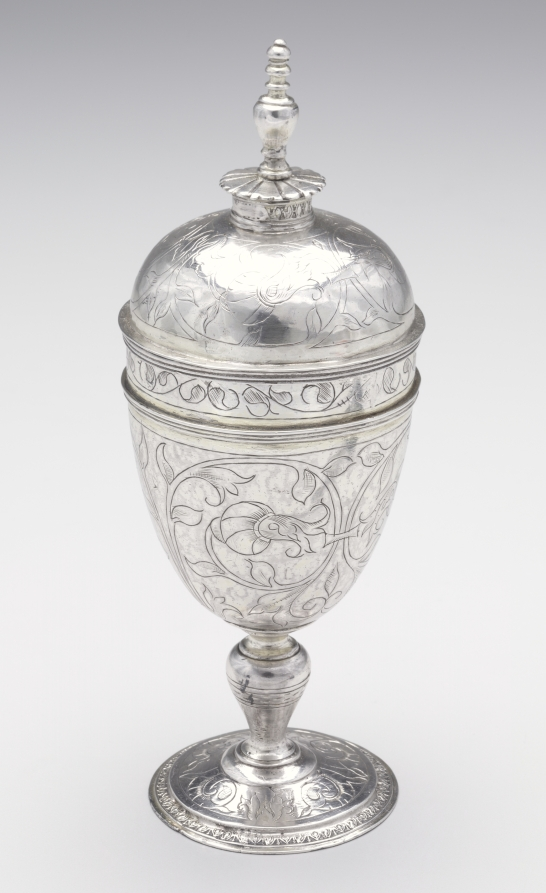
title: Standing Cup and Cover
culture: London, England, late 16th century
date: 1593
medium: silver, partially gilt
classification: Silver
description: Produced during the last years of the Tudor dynasty (1485–1603), this vessel exemplifies the symmetrical patterns, horizontal designs, and clear division of space typical of English silverwork at the time. The functional shape and ornamental designs characteristic of standing cups made them ideal for ceremonial occasions.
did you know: Often made for members of guilds and trade associations in London, standing cups were frequently used during toasts.